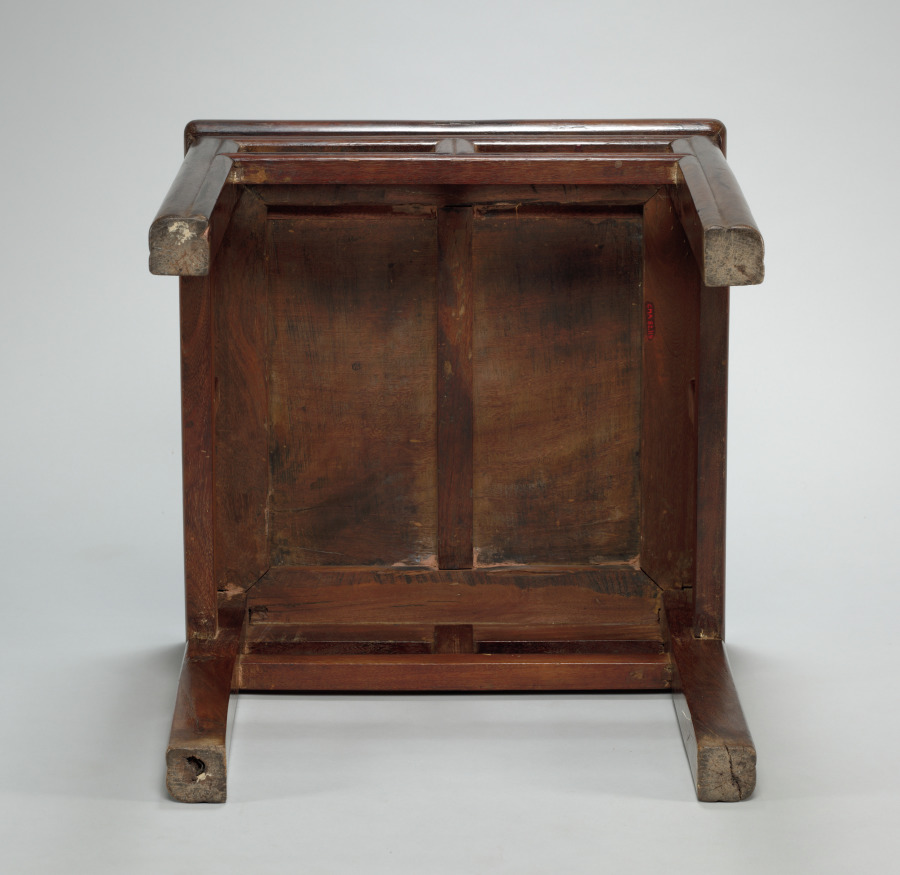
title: Stool (1 of 2)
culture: China, Qing dynasty (1644-1911)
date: 1700–1725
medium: Chicken-wing wood (jichimu)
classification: Furniture and woodwork